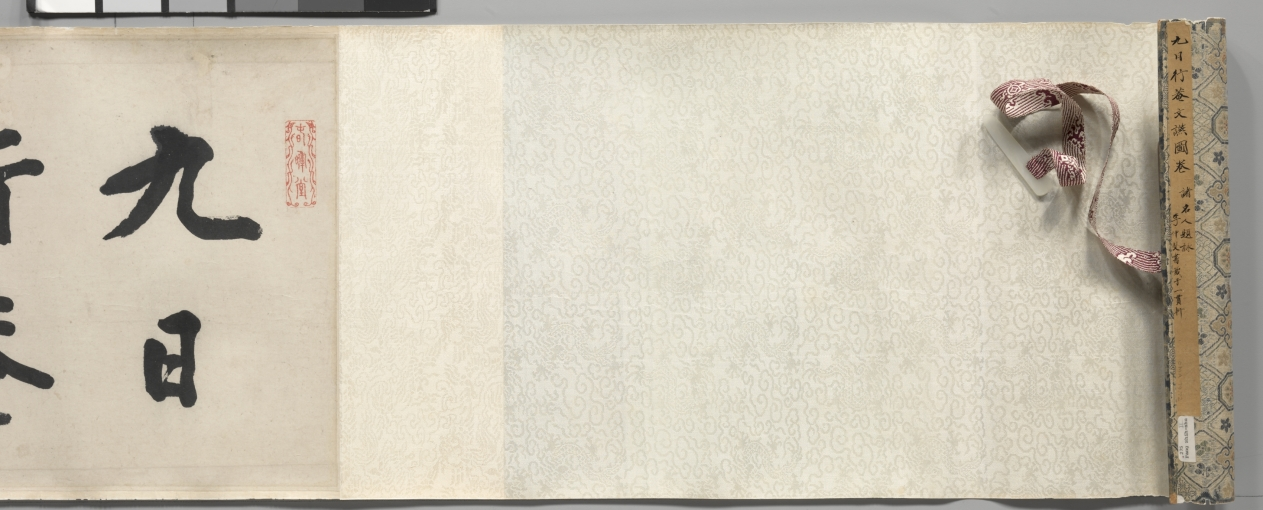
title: The Ninth Day Literary Gathering at Xing’an [Temporary Retreat]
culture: China, Qing dynasty (1644-1911)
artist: Fang Shishu (Chinese, 1693–1751)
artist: and Ye Fanglin (Chinese, active late 1600s–mid-1700s)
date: 1743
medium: Handscroll; ink and color on silk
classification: Painting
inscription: Fang Shishu's seal at beginning of painting: Ou ran shi de 偶然拾得. Ye Fanglin's seal at end of painting: Fanglin 芳林. Frontispiece title dated 1743 and 3 seals of Chen Bangyan 陳邦彦 (1678-1752).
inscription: 行庵在揚州北郭天寧寺西隅，馬君嶰谷半槎兄弟購僧房隙地所築，以為游息之處也。寺為晉謝太傅別墅。西隅饒古木，䨴鬱陰森，入林最僻，不知其近郛郭。庵居其中，無斲礱髤采之飾，惟軒庭多得清蔭，來憩者每流連而不能去。乾隆癸亥九日，積雨既收，風日清美，遂約同人，咸集於斯，中縣［懸］仇英白描陶靖節像，采黃花，酌白醪為供，乃以人世難逢開口笑，菊花雖插滿頭歸分韻賦詩。陶陶衎衎，觴詠竟日。既逾月，吳中寫真葉君敬［震］初適來，群貌小像，合為一卷，方君環山補景，命曰九日行庵文讌圖。裝池成，將各書所作於後，而囑鶚為之記。記按圖中共坐短榻者二人：右箕踞者，為武陵胡復齋先生期恆；左抱膝者，為天門唐南軒先生建中也。坐繩床者二人：中手牋者，歙方環山士庶；左仰首如欲語者，江都閔玉井華也。一人坐藤塾捻髭者，鄞全謝山祖望也。一人倚石坐若凝思者，臨潼張漁川四科也。樹下二人：離立把菊者，錢唐厲樊榭鶚；袖手者，錢唐陳竹町章也。一人憑石床坐撫琴者，江都程香溪先生夢星也。聽者三人：一人垂袖立者，祁門馬半查曰璐；二人坐瓷塾，左倚樹、右跂腳者，歙方西疇士疌 、汪恬齋玉樞也。二人對坐展卷者，左祁門馬嶰谷曰琯，右吳江王梅沂藻也。一人觀者，負手立於右，江都陸南圻鐘輝也。從後相倚觀者一人，歙洪曲溪振珂也。童子種菊者三人：樹間侍立者一人，撰杖、執卷者各一人。其植有蕉、有竹，又有雜樹，作丹黃青碧之色，紀時也。夫重九佳名，舉俗所重，而高常侍歎獨坐而搔首，陸天隨感登高以剫門，無其時地與人耳。今吾儕幸生太平，遇勝地，又皆素心有文之侶，固人世不可多得之會；而此十六人者，或土斷，或客游，聚散不常。異日者，歲月遷流，撫節物以有懷，一披此圖，悅如晤對。將來覽者，或亦不異此意乎。甲子夏五十有四日厲鴞記並書。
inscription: 揚州為江北大都會，居民連甍接楹，笙歌輿從，竟日喧聚，其於淸歌雅集，葢罕矣。城北天寧寺，為晉謝公駐節時所游息，其中有行庵，吾友馬君嶰谷、半查兄弟之小築也。地不踰五畝，而老樹古藤，森蔚相望，皆千百年物，間以修竹，春鳥秋蟲，更唱迭和，其間曲廊高榭，位置閑適。出門未數百步，即黃塵濁流極目，令人作惡。而此中獨蕭然有人外之思。乾隆八年九日，嶰谷兄弟招集同社一十四人祀陶公，出所藏仇實父白描像懸於閣上，各賦一詩。予方留滯西泠，未得預也。又踰旬而予至，諸君方擬繪圖記事，嶰谷曰：是不可無君。乃以展日更舉，令予得陪卷軸之末；而洪君曲溪，兩度皆以病失約，然故吟社中人也，亦補入焉。予太息謂諸君曰：謝公之風流，千古如在；然其游息於斯也，則與東山賓從之樂稍不同矣。公之為是行也，蓋以符氏之亂，思北定中原也。而其時公巳困於讒口，不自安於朝；雖在河朔極有可乘之會，而神明內索，徘徊不克自前。老師左次，竟無尺寸之功，坐失事幾。吾常過邵伯之埭，吊法雲之荒祠，未嘗不喟然累啼，以為明德之衰也。至若九日嘉名，陶公高格，固在羲皇懷葛之間；然而讀其 止酒之詩，蒼梧漢水之感，以瘦詞寄其孤憤則夫黃花白酒，蓋亦不得巳而漫與焉者。今吾輩生逢太平之日，書淫墨癖，是處留連，胸次中了無一事，為江湖之幸民，論人雖甚媿，論其時與地，則不可不私相慶也。諸君曰：善。圖之詳巳見於厲君樊榭記中。予之許為嶰谷兄弟序斯圖也，三年於茲；今夏重披圖捉筆，而唐丈南軒，巳化為異物矣。對酒當歌，人生幾何，願與諸君並日相遇從焉。丙寅夏杪孤山社小泉翁全祖望序。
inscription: 6 additional colophons and 15 additional seals: 1 colophon, dated 1746, and 1 seal of Huang Zhijun 黃之雋 (1668-after 1746); 1 colophon and 2 seals of Zha Xiang 查祥 (1718 jinshi); 1 colophon, dated 1746, and 3 seals of Zhang Siwen 張思問; 1 colophon, dated 1748, and 4 seals of Shao Dong 卲東 (1721 jinshi); 1 colophon, dated 1753, and 2 seals of Fang Shiju 方世舉 (signing as Fang Funan 方扶南); 1 colophon, dated 1808, of Ruan Yuan 阮元 (1764–1849); 3 seals unidentified.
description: By the 1700s, Yangzhou was flourishing both economically and culturally as the most prosperous city in China, having surpassed all other Jiangnan cities in their creation of gardens. This group portrait commemorates a literary gathering in the private garden of the salt merchants and art patrons Ma Yueguan (1688–1755) and his brother Ma Yuelu (1697–after 1766) in Yangzhou. Ma Yueguan received imperial recognition for providing financial aid and food relief for those affected by flood and drought. Ma Yueguan is seen seated at the end of the painting holding an open scroll while Ma Yuelu stands behind the qin instrument player. Among the guests were officials, scholars, poets, painters, and merchants, a mix of local members of a poetry club reflecting increasing social diversity.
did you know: The two hosts and their fourteen guests were all officials, scholars, poets, painters, and salt merchants.